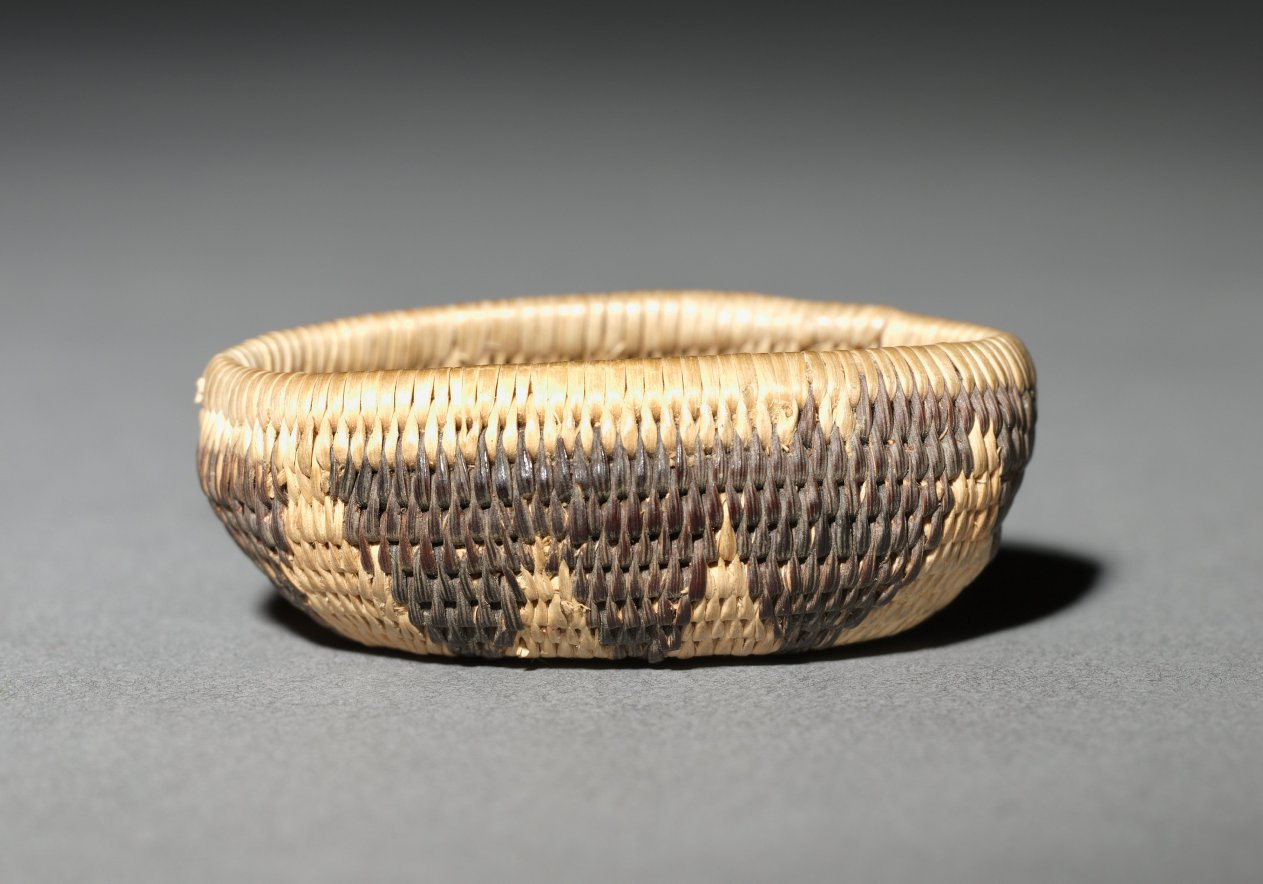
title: Miniature Basket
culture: America, Native North American, Southwest, Arizona, Akimel O'odham (Pima), Unassigned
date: before 1923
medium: plant fiber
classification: Basketry